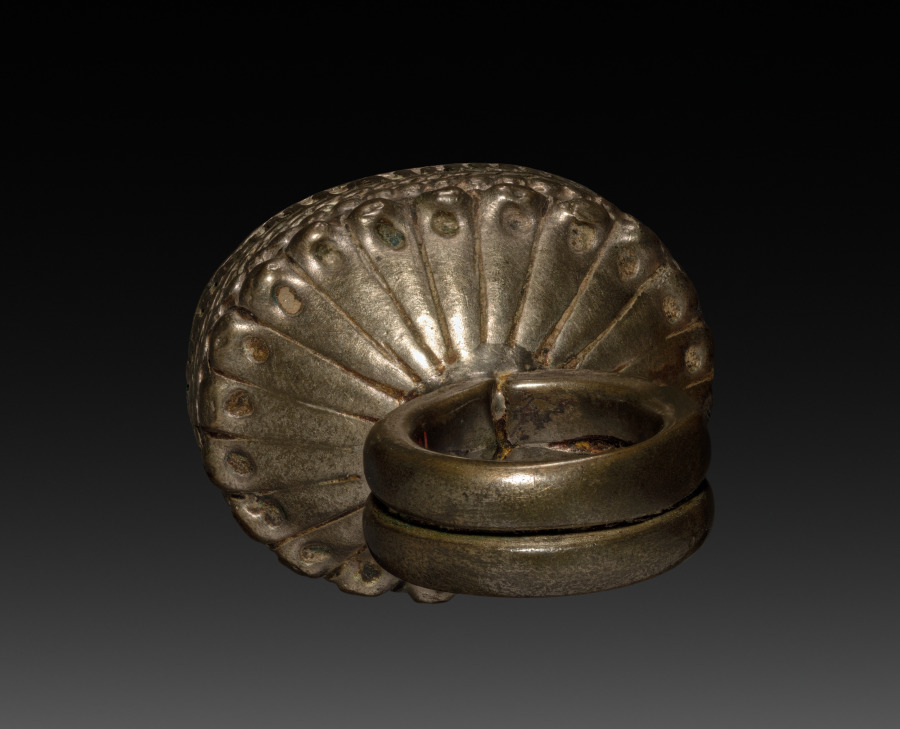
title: Ring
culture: Tibet(?)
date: 1800s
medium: silver with cornelian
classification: Jewelry